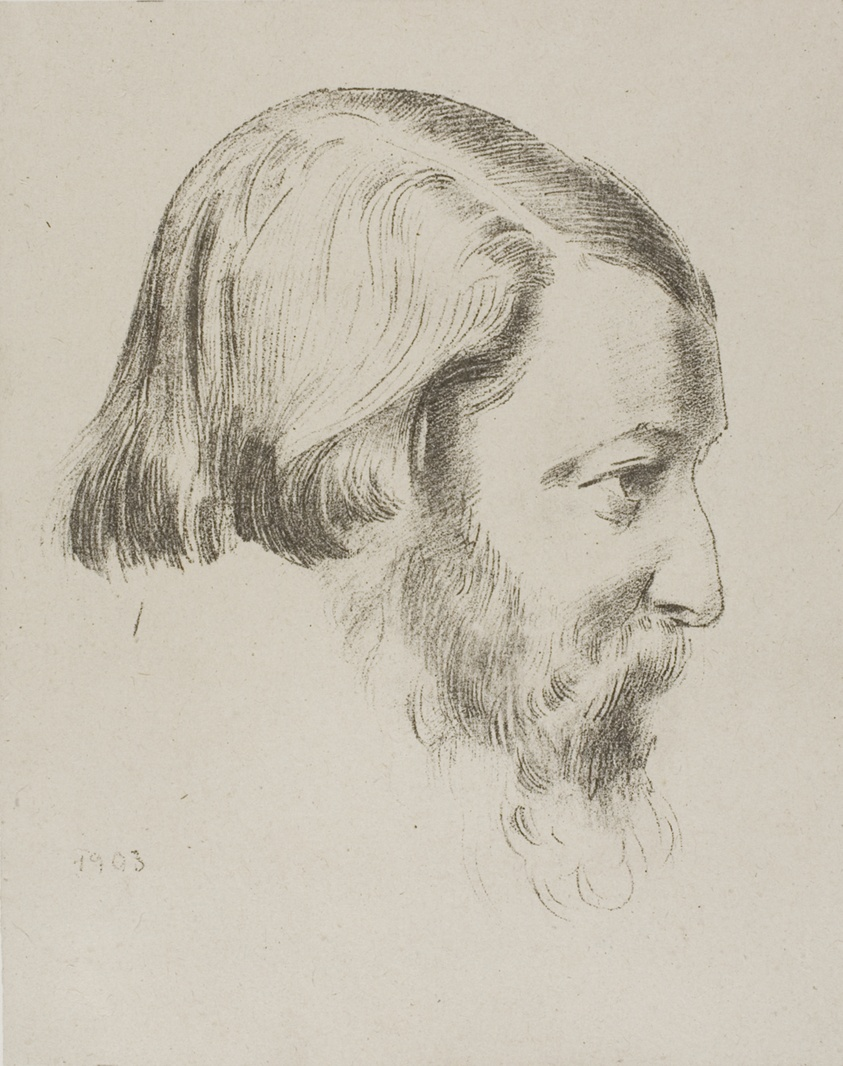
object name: Print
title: Paul Sérusier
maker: Odilon Redon (French, 1840-1916)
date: 1903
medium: Lithograph in black on light gray China paper laid down on white wove paper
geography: France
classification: lithograph; print; prints and drawing; paper